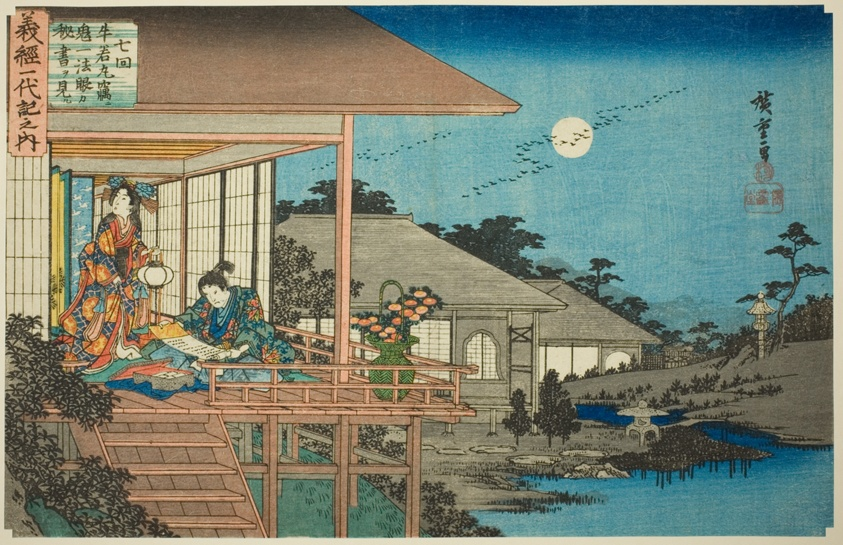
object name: Print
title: No. 7: Ushiwakamaru Reading Kiichi Hogan's Secret Scroll (Nanakai, Ushiwakamaru hisoka ni Kiichi Hogan no hisho o miru), from the series "The Life of Yoshitsune (Yoshitsune ichidaiki no uchi)"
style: Japanese (culture or style)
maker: Utagawa Hiroshige 歌川 広重; Japanese, 1797-1858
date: c. 1832/34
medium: Color woodblock print; oban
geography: Japan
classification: woodblock print; print; asian art